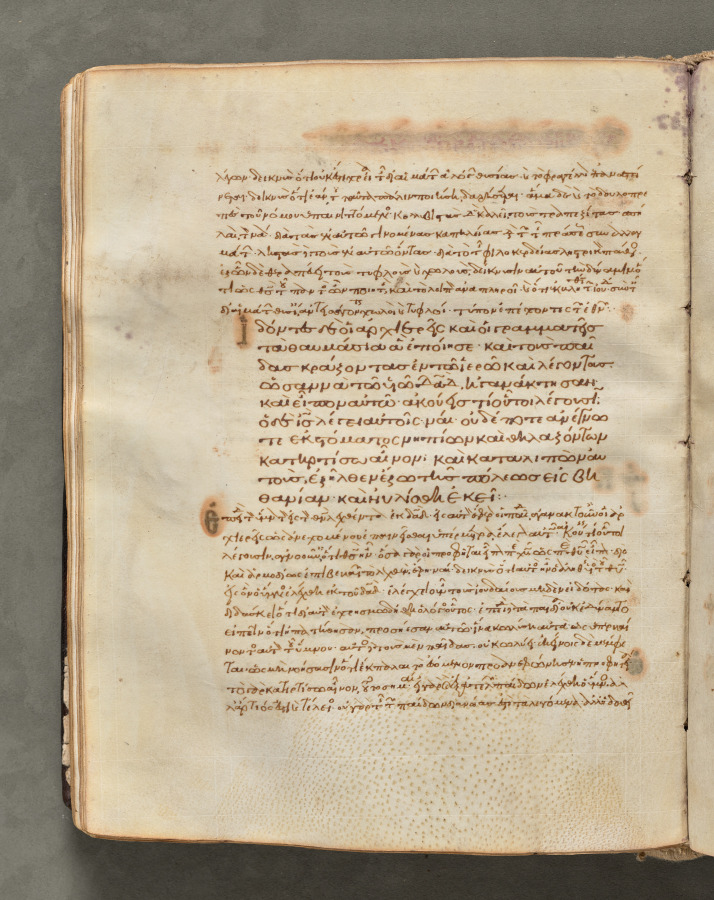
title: Text, folio 92 (verso), from a Gospel Book with Commentaries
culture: Byzantium, Constantinople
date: c. 1000–1100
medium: ink, tempera, and gold on vellum; leather binding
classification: Bound Volume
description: Each of the four gospels in this book opens on a page with brilliantly illuminated borders depicting the author of the text as well as birds-principally peacocks, symbols of the immortality of the soul-and fountains, representing the fountain of life and the salvation of the soul. This volume consists of 428 leaves with texts in Greek. Its level of sophistication suggests that it was probably written and decorated in a monastery in Constantinople.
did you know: Gospel Books were carried in procession through Byzantine churches.